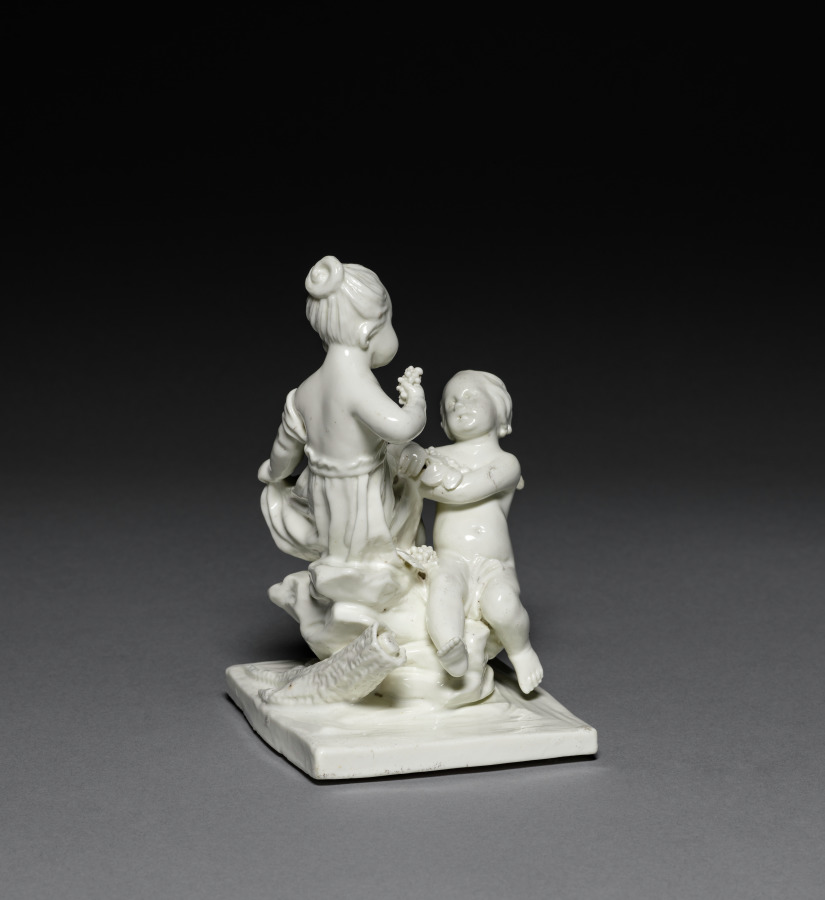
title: Girl with Putto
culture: France, Chantilly, 18th century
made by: probably by Chantilly Porcelain Factory (French)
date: 1760s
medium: soft-paste porcelain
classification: Ceramic